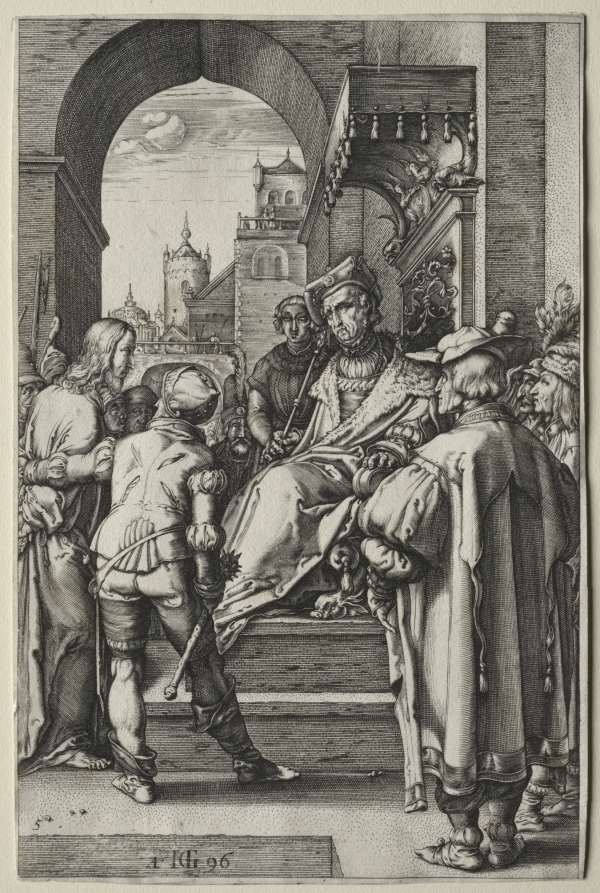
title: The Passion: Christ before Pilate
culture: Netherlands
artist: Hendrick Goltzius (Dutch, 1558–1617)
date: 1596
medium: engraving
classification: Print